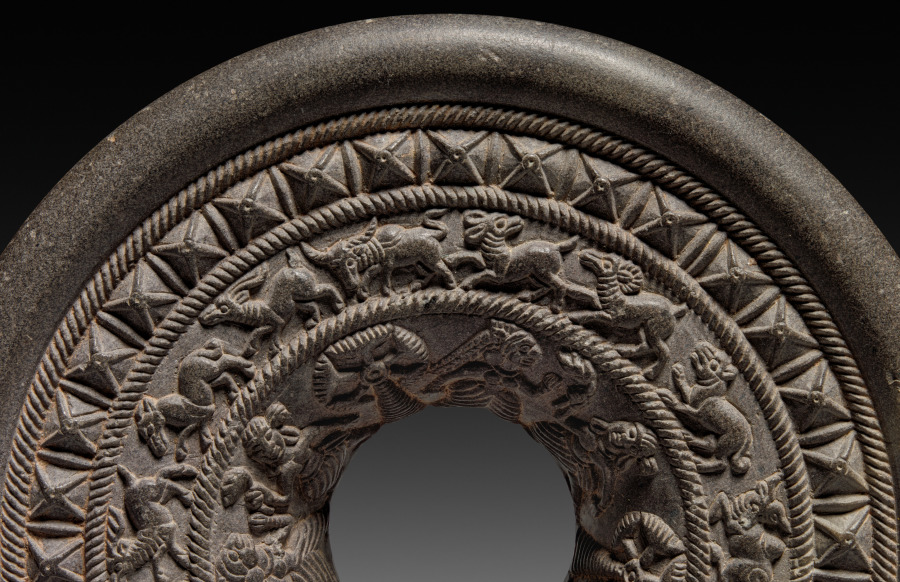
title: Ringstone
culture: India, Maurya period (322–185 BCE)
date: 200s BCE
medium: steatite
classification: Sculpture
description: Ringstones are among the earliest works of art to be created in stone during India's historical period. This example is finely carved with detailed images of affectionate couples and palm trees, running animals, and geometric motifs in concentric circles. The function of ringstones remains uncertain, since none of the surviving examples is inscribed or explained in a text.